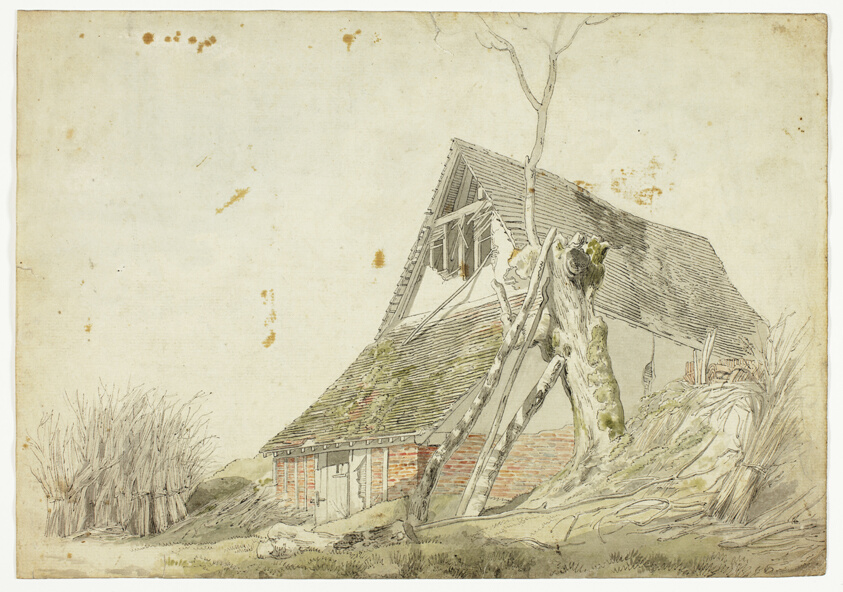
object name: Drawing and Watercolor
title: Farm House in Ruins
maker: Possibly Michael "Angelo" Rooker (English, 1746-1801); or John Alexander Gresse (English, 1741-1794)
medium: Pen and black ink, with brush and watercolor, over graphite on ivory laid paper, laid down on card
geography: England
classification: watercolor; drawings (visual works); prints and drawing